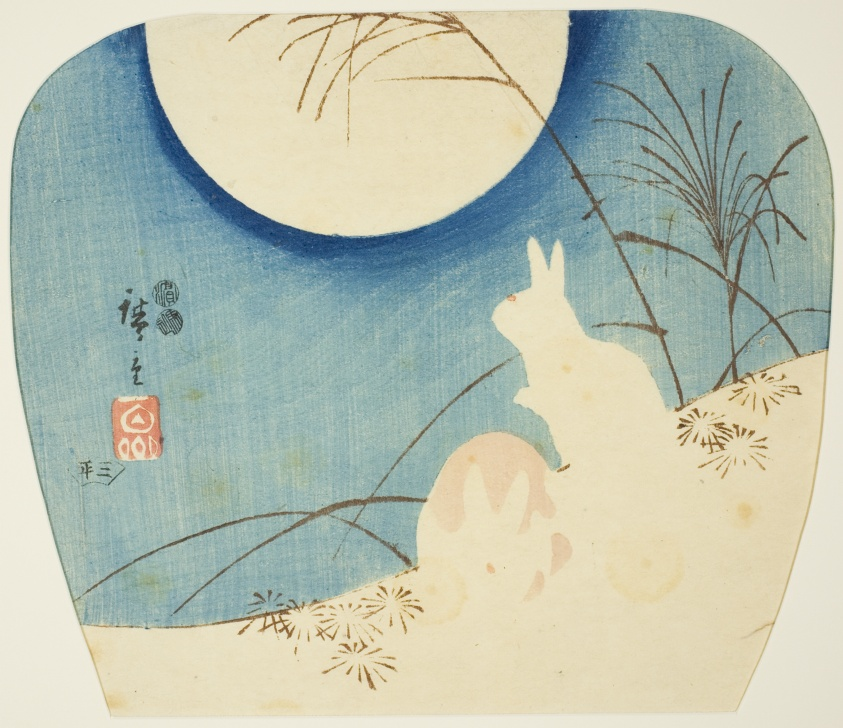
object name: Print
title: Rabbits in moonlight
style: Japanese (culture or style)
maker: Utagawa Hiroshige 歌川 広重; Japanese, 1797-1858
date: c. 1849/52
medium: Color woodblock print; uchiwa-e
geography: Japan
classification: woodblock print; print; asian art